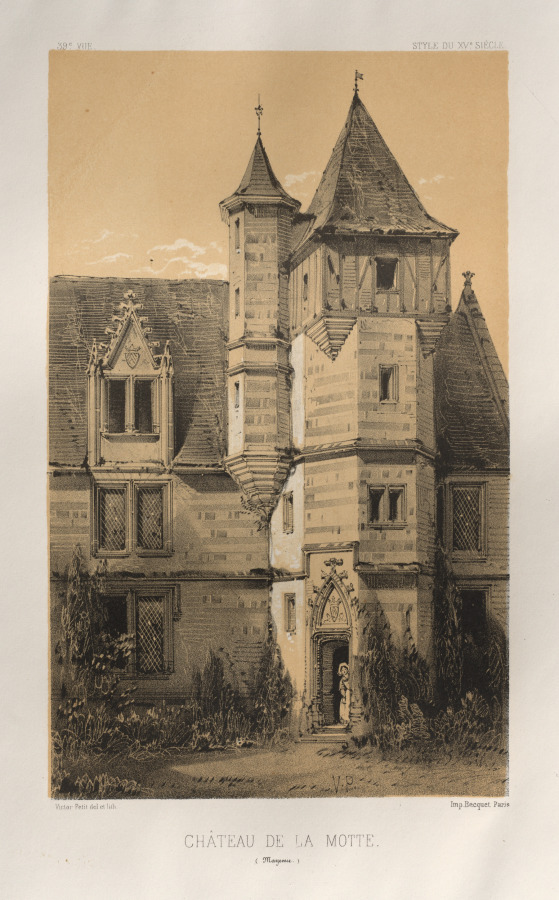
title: Architecture Pittoresque ou Monuments des xveme. Et xvieme. Siecles: Chateaux De France des XV et XVI Siecles: Pl. 39, Château De La Motte (Mayenne)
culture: France, 19th century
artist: Victor Petit (French, 1817–1874)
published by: Charles Boivin (publisher and editor); Lith de Godard a Paris (printer)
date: 1860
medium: lithograph with tint stone, from portfolio of 100 lithographs with tint stone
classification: Print